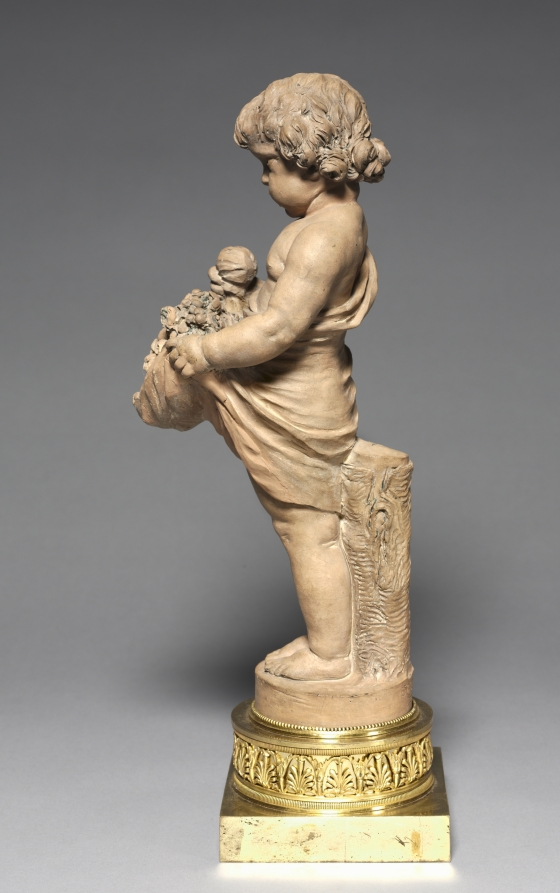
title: Child Carrying Fruit and Flowers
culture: France, 18th century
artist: Clodion (French, 1738–1814)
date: 18th-early 19th century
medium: terracotta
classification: Sculpture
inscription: Signed: "Clodion"; signature incised on back in the terracotta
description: French sculptor Claude Michel, called Clodion, frequently depicts children in his sculpture, in this case a convincing toddler, from her pout to her plump toes. The piece is constructed in terracotta, a common medium for Clodion. After firing, the unglazed color of the clay can vary widely; each of Clodion's statues has a slightly different hue. The figure has sustained a number of damages, but has recently been cleaned and repaired.